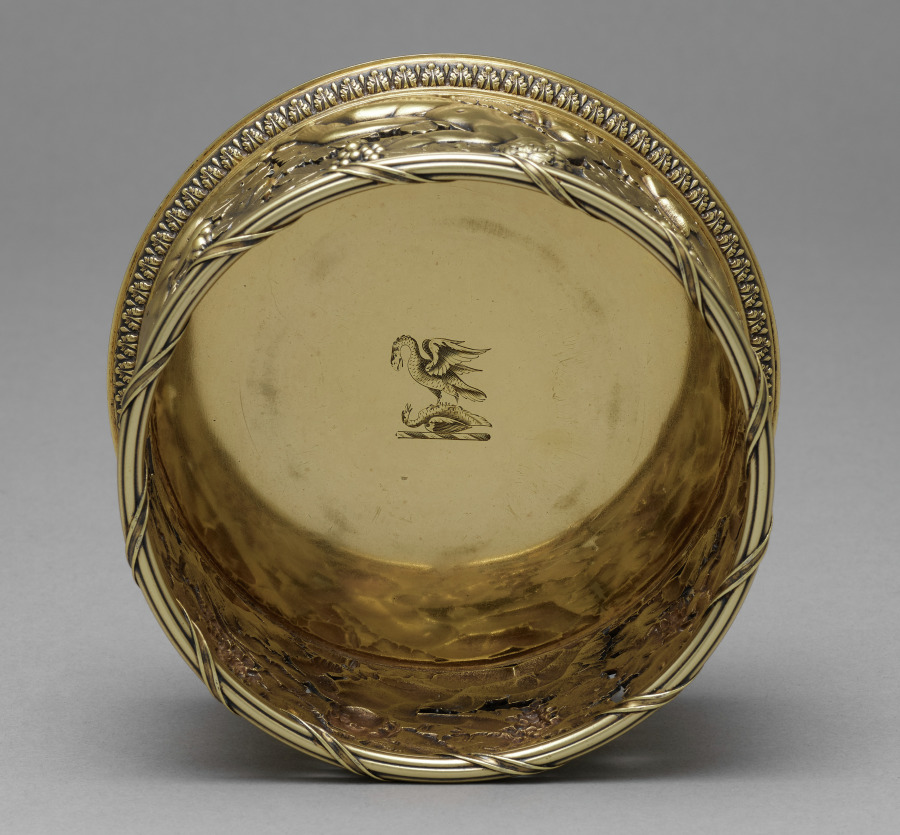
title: Decanter Stand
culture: England, London, 19th century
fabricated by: Paul Storr (British, 1771–1844)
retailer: Rundell, Bridge and Rundell (British, 1797–1834)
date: 1814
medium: silver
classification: Silver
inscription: Engraved on rim of base: "RUNDELL BRIDGE ET RUNDELL AURIFICES REGIS ET PRINCIPIS WALLIAE REGENTIS BRITANNIAS." Engraved on base of interior: Unidentifiable crest with bird over other animal.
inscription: Scratched on rim of base: "6625"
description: Decanter stands served as coasters for glass wine bottles in order to protect the extremely expensive and fragile linen tablecloths they sat upon. This example contains depictions of large grape vines and youthful figures that evoke the Roman god of wine, Bacchus (or Dionysus in Greek mythology). One of the young boys grasps an empty drinking vessel while the other leans against a panther, the frequent companion of Bacchus.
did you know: Bacchanal motifs of grapes and consumption echo this object’s function as a stand for a wine decanter.